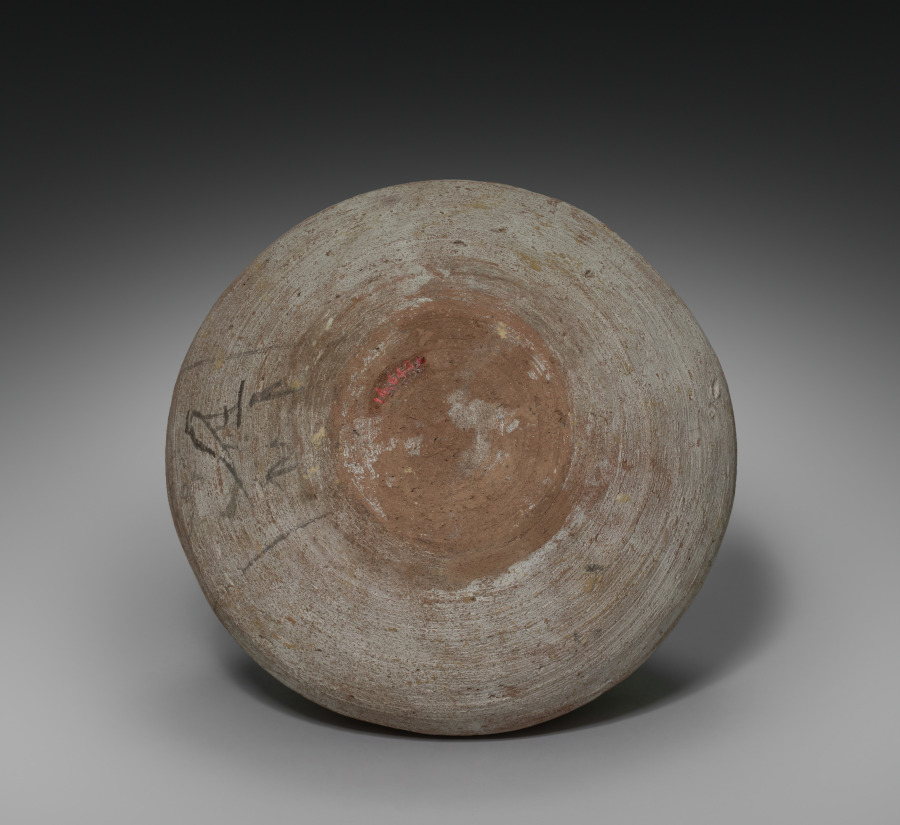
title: Shawabty Jar with Lid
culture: Egypt, New Kingdom (1540–1069 BCE), Dynasties 19–20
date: 1295–1069 BCE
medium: Nile silt ware; lid of limestone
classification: Funerary Equipment